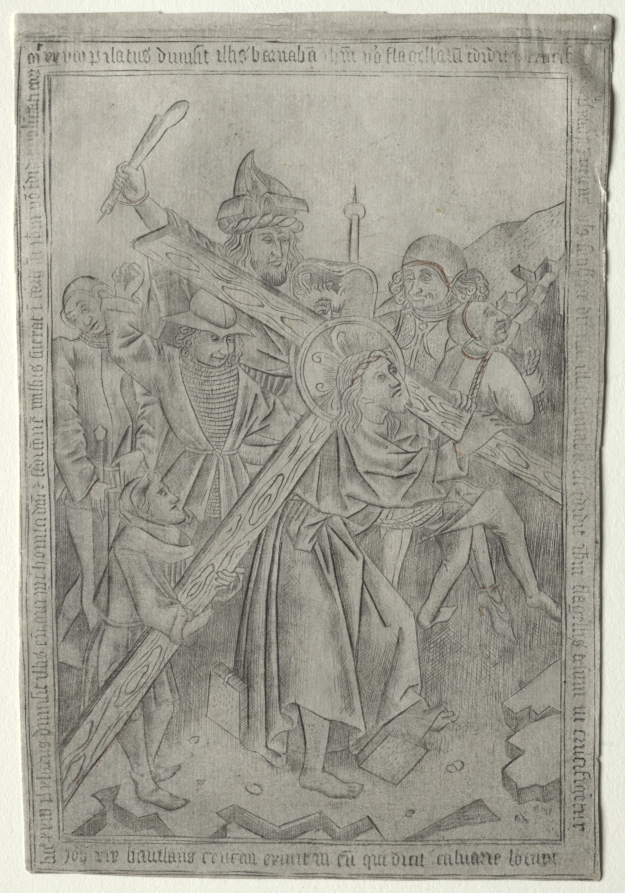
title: The Passion: The Cross Bearing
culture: Netherlands, 15th century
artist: Master of the Banderoles (Netherlandish, active about 1450–75)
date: c. 1450–75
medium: engraving with traces of hand coloring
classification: Print